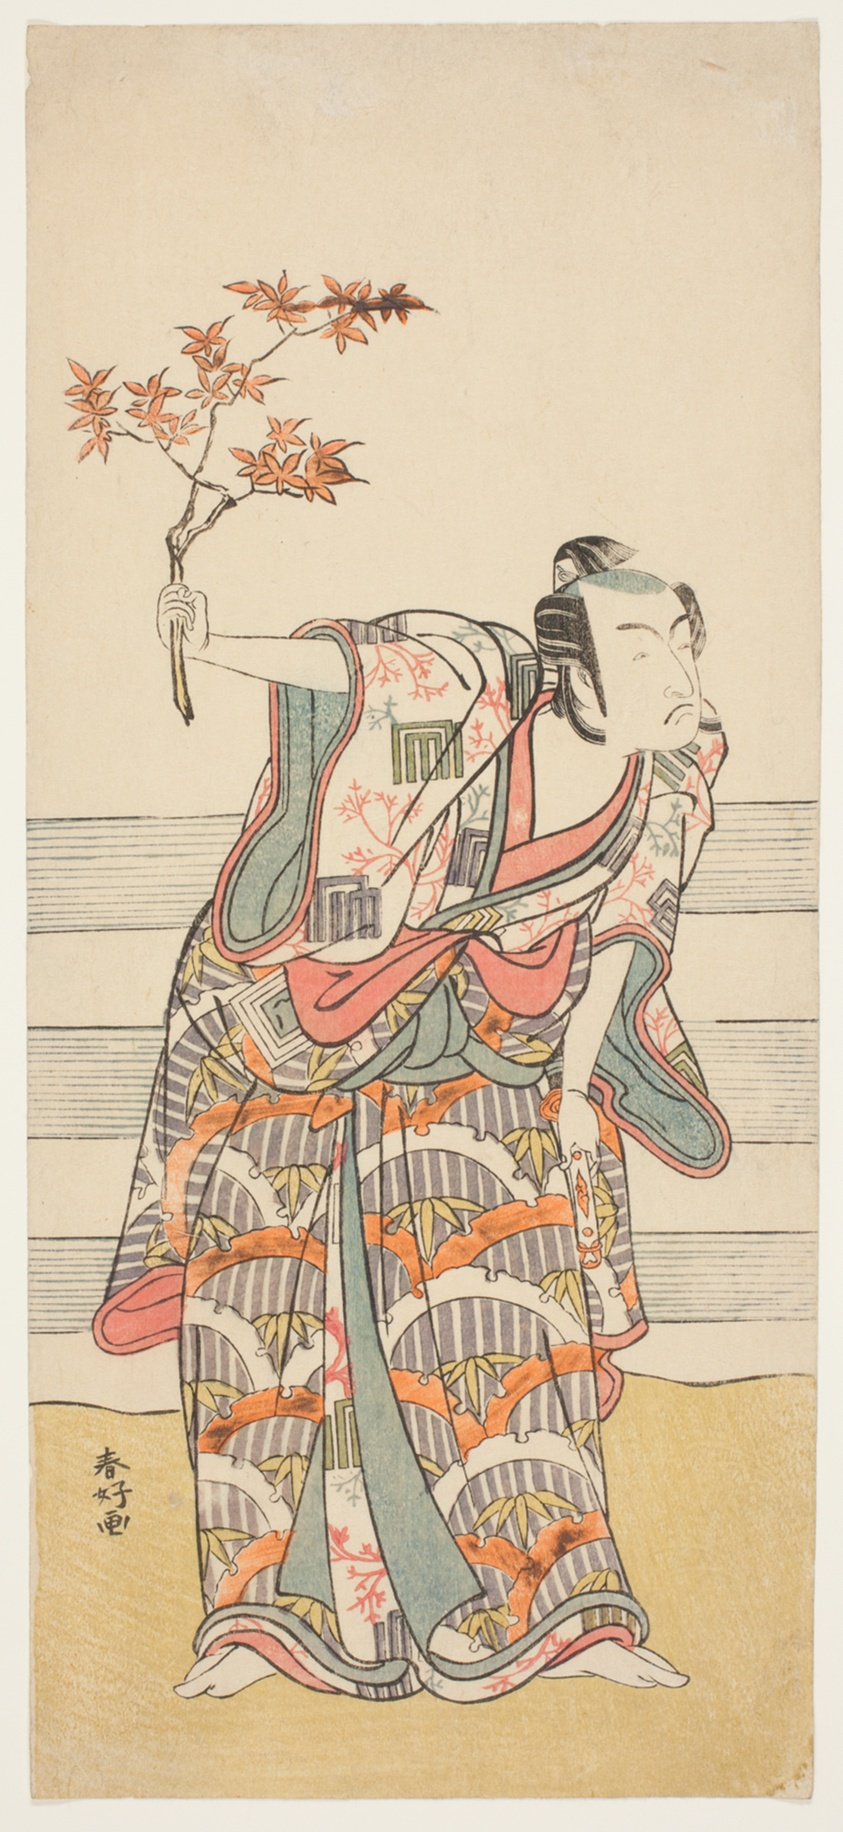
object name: Print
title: Actor Ichikawa Monnosuke II in an Unidentified Role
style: Japanese (culture or style)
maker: Katsukawa Shunkô; Japanese, 1743–1812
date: About 1785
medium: Color woodblock print; hosoban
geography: Japan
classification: woodblock print; print; asian art